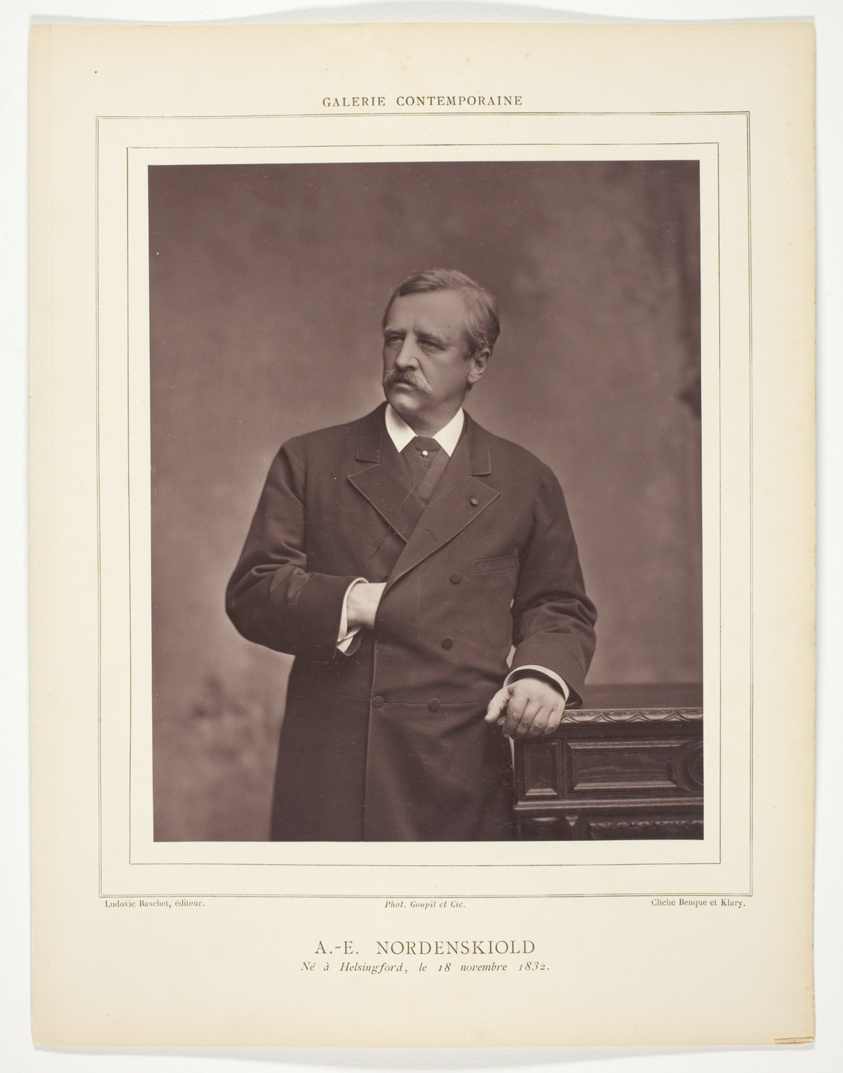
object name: Photograph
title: A. E. Nordenskiold (Swedish geologist and mineralogist, born Finland, 1832-1901)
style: 19th century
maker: Benque et Klary (French, 19th century)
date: c. 1880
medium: Woodburytype, from the periodical “Galerie Contemporaine Littéraire, Artistique" (1880), volume 1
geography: France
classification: woodburytype; photomechanical process; photography; photograph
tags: Collected by Hugh Edwards, Contemporaine Littéraire